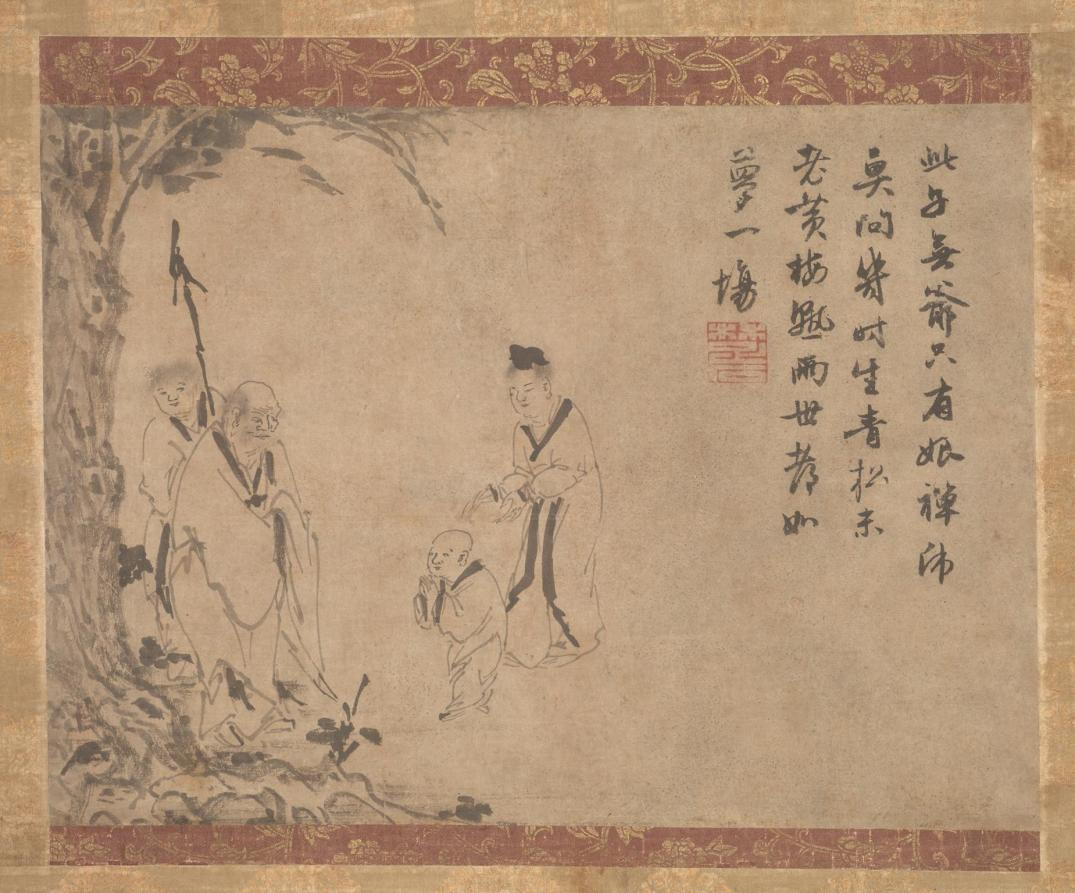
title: The Second Coming of the Fifth Patriarch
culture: China, Yuan dynasty (1271-1368)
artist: Yintuoluo (Chinese, c. 1285-c. 1355)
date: c. mid-1300s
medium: section of a handscroll mounted as a hanging scroll, ink on paper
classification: Painting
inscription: [印] 人言洞裡桃花源，未必人間有此枝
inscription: 此子無爺只有娘，禪師莫問幾時生。 青松未老黃梅飄，兩世都如夢一場。 [印] 楚石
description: A small boy, accompanied by his mother, is closing his hands in greeting to an old monk who has a young attendant standing behind him. Scholars believe the scene is a meeting between the fourth patriarch of Chan Buddhism, Daoxin 道信, and the little boy, who was the reincarnation of an old monk named Zaisong daozhe 栽松道者 (Pine Planter). They had encountered before, during which Daoxin advised the Pine Planter to endure a reincarnation as he was too old to reach enlightenment. This painting is done by Yintuoluo, an artist renowned for his simple and unadorned style.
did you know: This painting is just a section of a handscroll that has been remounted as a hanging scroll.